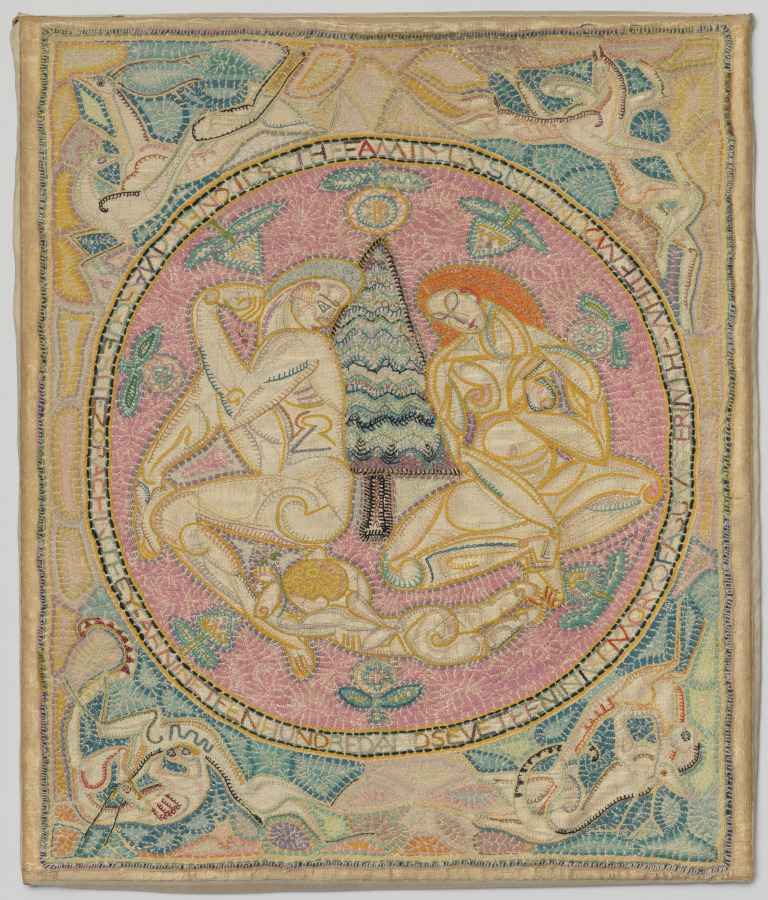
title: The Family (In Memory of a Summer in the White Mountains)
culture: America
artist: Marguerite Zorach (American, 1887–1968)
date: 1917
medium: plain weave silk; wool embroidery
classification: Embroidery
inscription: THE FAMILY / DONE BY MARGUERITE ZORACH IN THE YEAR NINETEEN HUNDRED AND SEVENTEEN IN MEMORY OF A SUMMER IN THE WHITE MOUNTAINS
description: Marguerite Zorach conceived her large, complex embroideries as major artistic statements at a time when the medium was routinely considered “craft,” as opposed to “fine art.” In doing so, she helped to erase such distinctions. One of her most acclaimed works, this example celebrates humanity in harmony with nature, presenting the artist, her husband (a Cleveland-raised sculptor named William Zorach), and their son amid an evergreen tree and four pairs of animals. Very time consuming to create, Zorach’s embroideries are rare.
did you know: In 1925, Zorach served as first president of the New York Society of Women Artists, an organization still in existence.